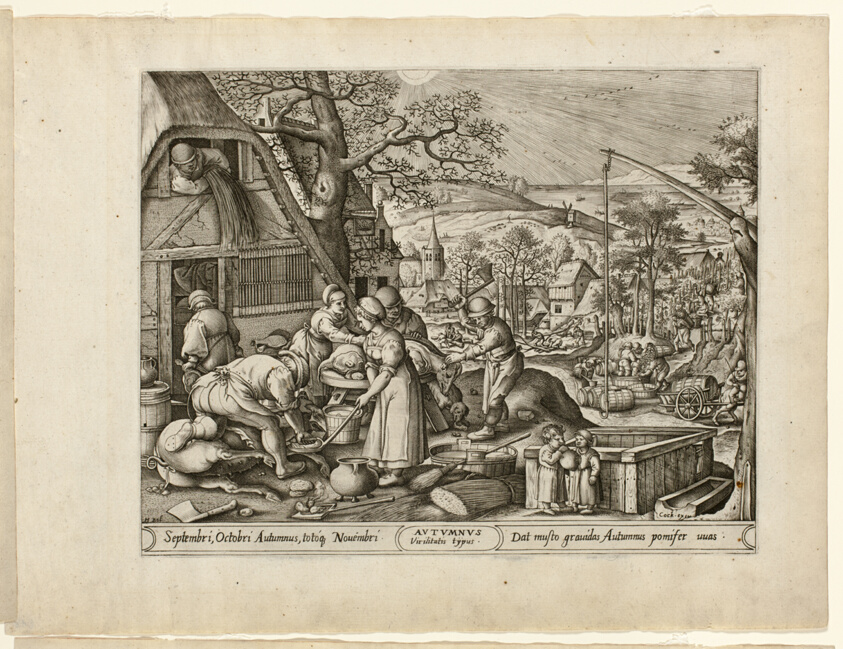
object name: Print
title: Autumn, from The Four Seasons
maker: Pieter van der Heyden (Flemish, c. 1530–after 1584); after Hans Bol (Netherlandish, 1534–1593); published by Hieronymus Cock (Flemish, c. 1510–1570)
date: 1570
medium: Engraving with etching in black on ivory laid paper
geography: Flanders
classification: engraving; paper; print; prints and drawing